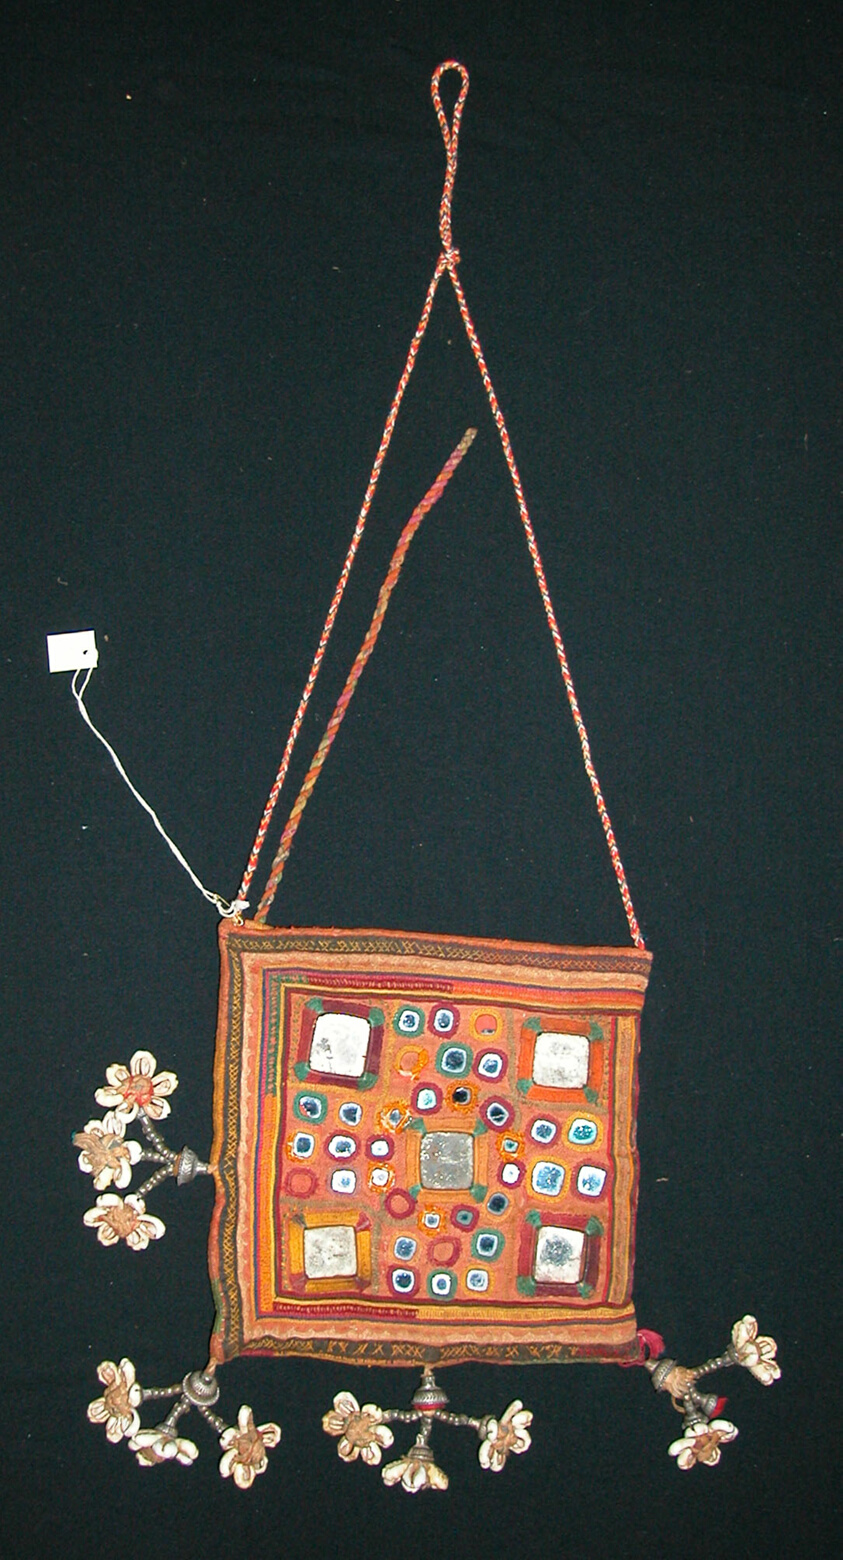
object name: Costume and Accessories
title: Bag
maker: Banjara (India, Rajasthan)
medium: Cotton, plain weave; embroidered with chain stitch, cross-stitch, herringbone stitch, and buttonhole stitch with applied mirrors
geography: India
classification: textile; needlework (visual works); costume